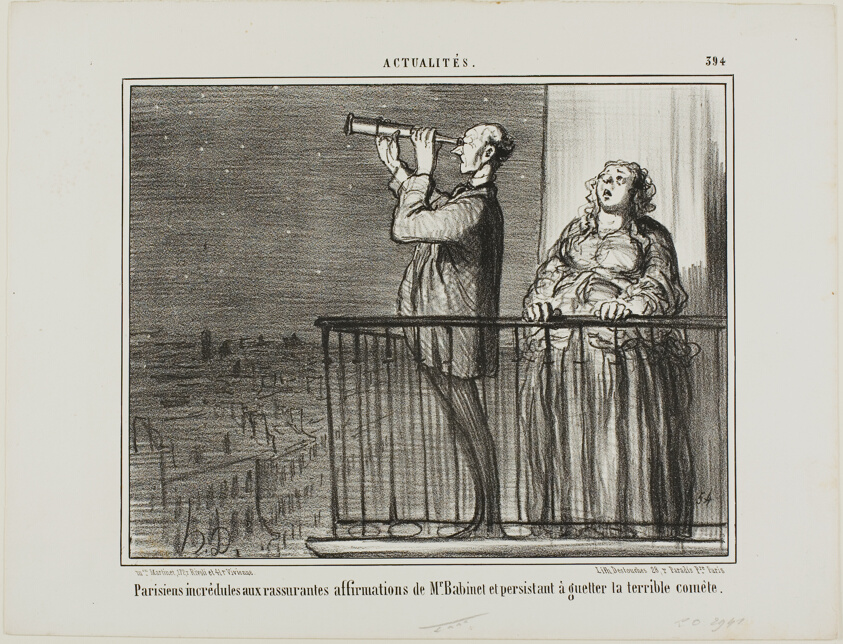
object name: Print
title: The Parisians don't quite trust the assurances of Monsieur Babinet and insist on lying in wait for the comet, plate 394 from Actualités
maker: Honoré Victorin Daumier; French, 1808-1879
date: May 1, 1857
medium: Lithograph in black on white wove paper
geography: France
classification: lithograph; print; prints and drawing